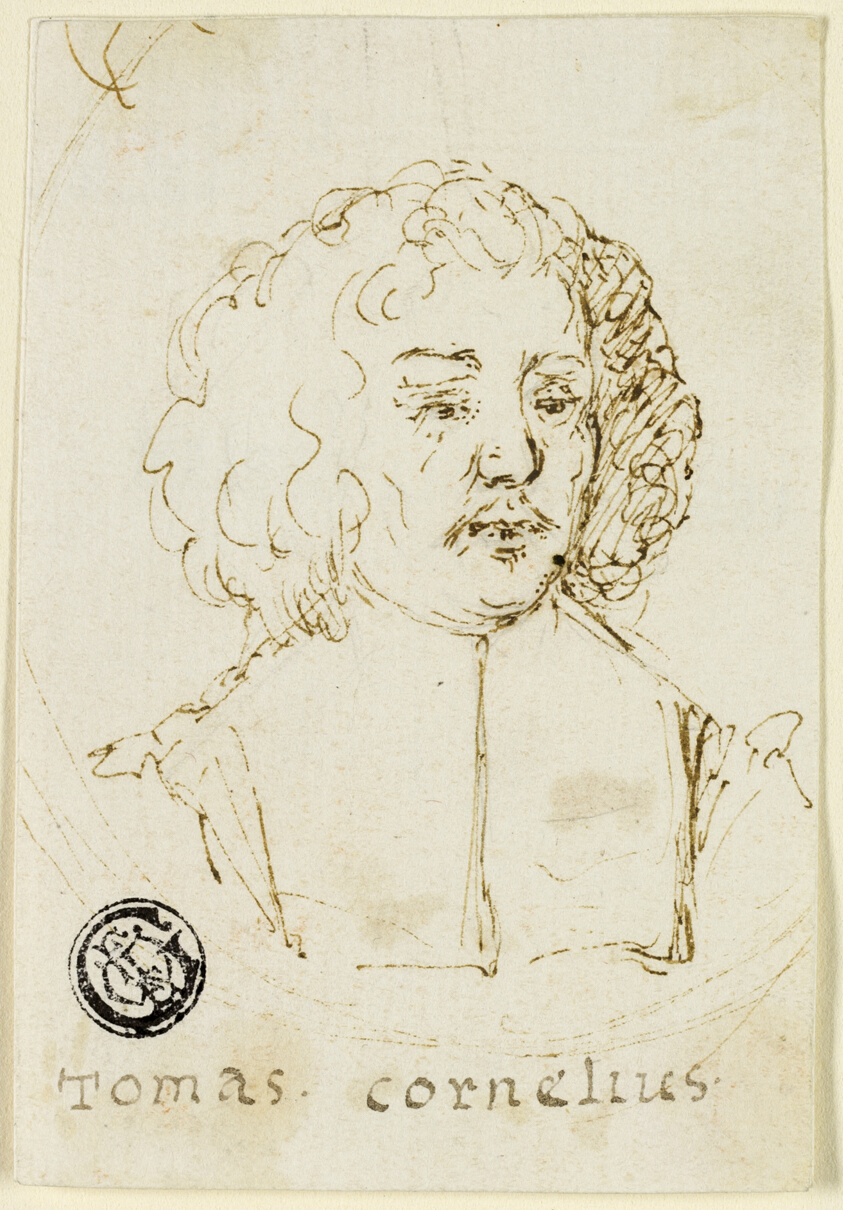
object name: Drawing and Watercolor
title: Bust of Reverend Tomas Cornelius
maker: Unknown Artist; French, 17th century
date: 17th century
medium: Pen and brown ink, over traces of graphite, on ivory laid paper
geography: France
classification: pen and ink drawings; drawings (visual works); prints and drawing